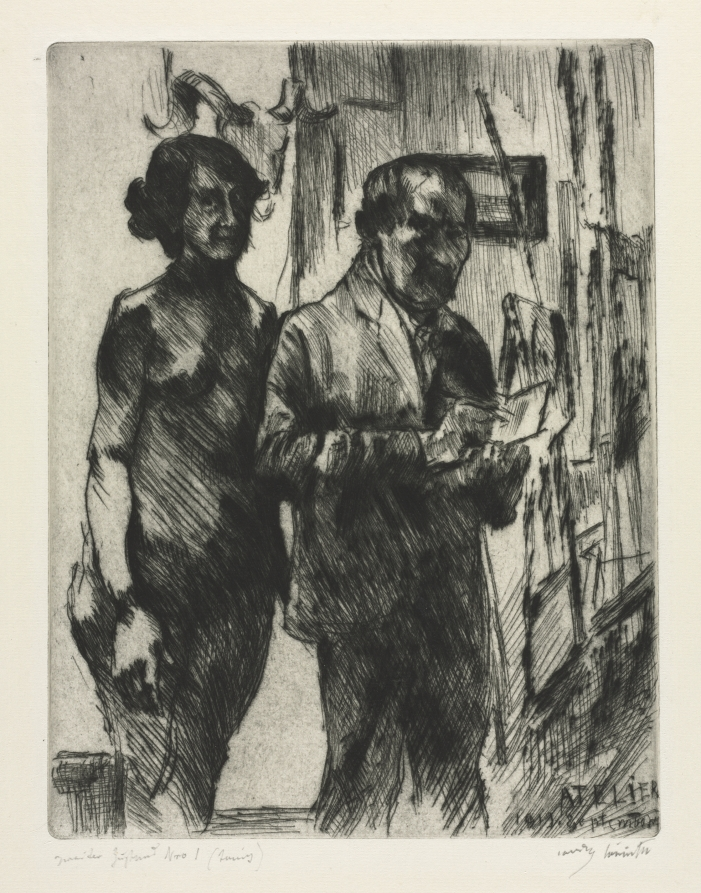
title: In the Studio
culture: Germany, 20th century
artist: Lovis Corinth (German, 1858–1925)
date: 1919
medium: drypoint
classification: Print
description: Made in the final years of Lovis Corinth’s life, this self-portrait shows him standing in his studio with his wife, Charlotte, posed behind him in the nude with shaded features. Corinth had suffered a stroke in 1911, but with the help of Charlotte he continued to make art focusing largely on his family life. Charlotte’s presence indicates her importance to him as both supporter and muse.